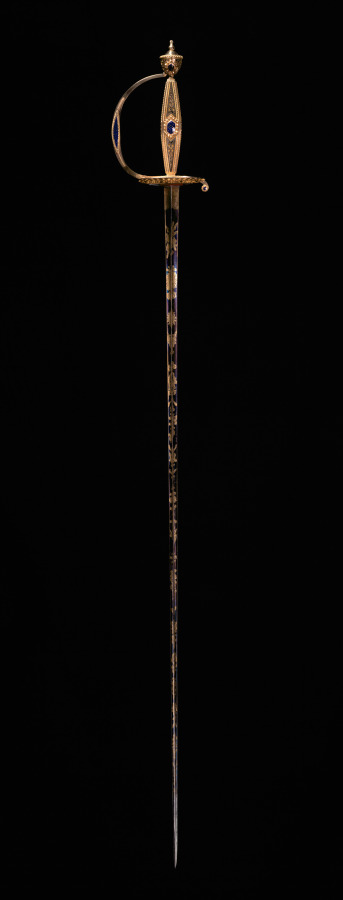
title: Small-Sword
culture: Switzerland, Geneva(?) (blade: Germany, Solingen, early 18th c.), late 18th Century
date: c. 1790–1800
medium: hilt: gold with blue translucent enamel; blade: etched, blued and gilded steel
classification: Arms and Armor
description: This example shows the small-sword at its latest and most refined stage of development. Though highly reflective of French taste, it was probably fashioned in a Swiss workshop under French influence or by a French craftsman working in Switzerland. Worn publicly as an emblem of social rank, this sword was likely custom-made for an affluent individual to use on formal or court occasions. So-called because of its short blade, the small-sword emerged as the light and quick weapon of choice for aristocratic civilians during the 1700s. Such a sword was traditionally suspended at about mid-thigh from the left side of a belt, the hilt exposed through the opening of the gentleman's coat. Highly visible, the hilt invited lavish decoration through precious materials such as gold and enamels, as seen here. Considered a type of masculine jewelry at that time, small-swords featured a variety of hilt styles that went in and out of fashion. Many were decorated to match personal costume, and jewelers worked on the finest small-swords of the day.